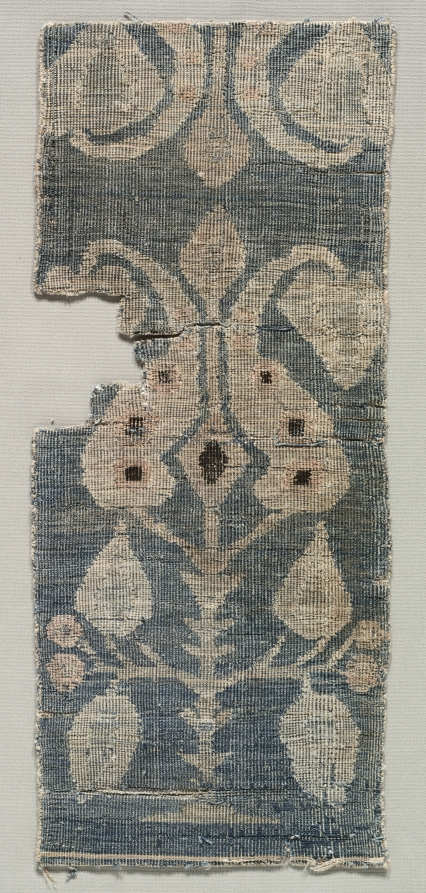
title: Two-faced Carpet Fragment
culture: Iran ?, Seljuq period (1037–1194)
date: 1100s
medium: senna knot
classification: Textile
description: This fragment preserves portions of designs of two faces of a carpet. One design depicts a stylized tulip with part of its mirror image. The opposite side depicts a pair of winged ibexes oriented at right angles to the "tulip" design.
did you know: The tulip symbolizes modesty before God because, when in full bloom, it bows its head.